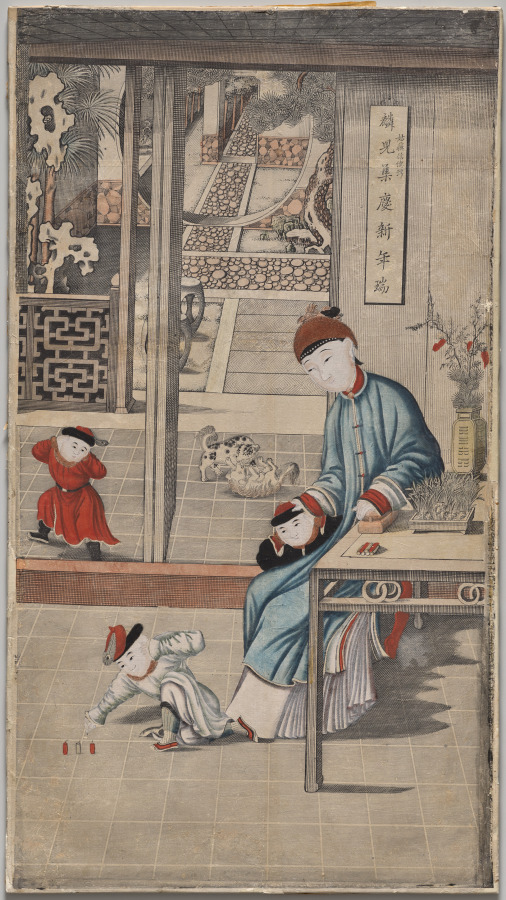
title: Gusu Beauty – Winter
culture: China, Qing dynasty (1644–1911), Qianlong period (1736–95)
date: 1736–95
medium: Polychrome woodblock print; ink and color on paper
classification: Print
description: In the 1600s, printing flourished in such Jiangnan cities as Nanjing, Suzhou, Hangzhou, and Huizhou, evolving from privately enjoyed illustrated books printed in color to more commercialized single-sheet color prints that were hung on walls and became part of the rich urban visual culture.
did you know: Woodblock printing in color reached a height in China in the 1600s to 1700s. The prints were executed by means of sets of separate blocks, each carved to print a different color.